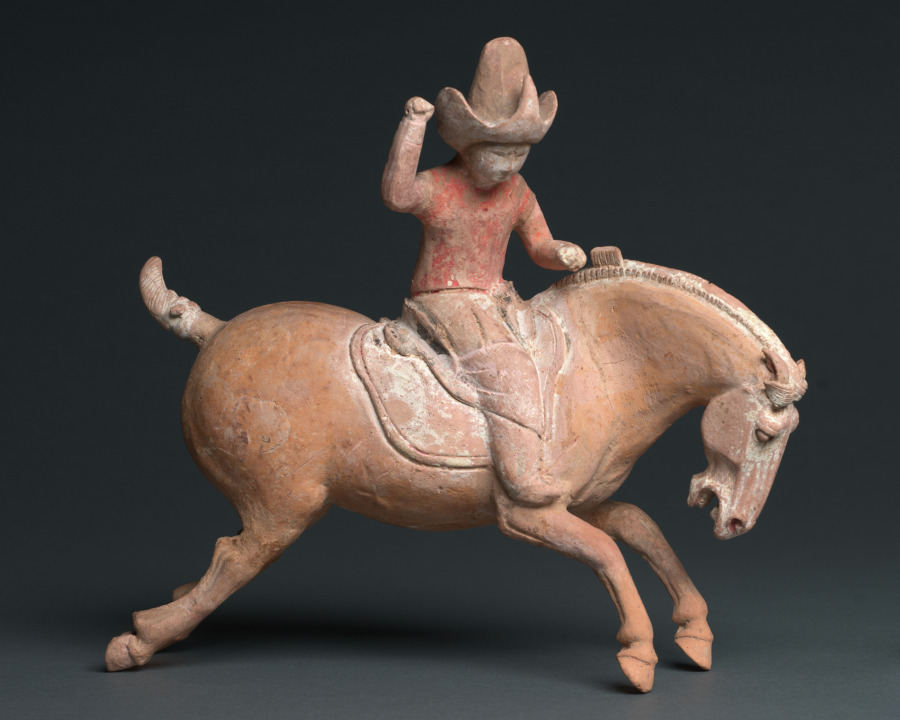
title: Polo Player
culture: China, Tang dynasty (618-907)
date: late 600s-early 700s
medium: painted earthenware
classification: Sculpture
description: An exercise for military troops, polo was also fashionable among men and women of Tang China, and this polo player is actually a woman dressed in a man's riding habit. It is in keeping with the exuberance of the Tang dynasty that such sporting figures of daily life should be among objects for the afterlife.